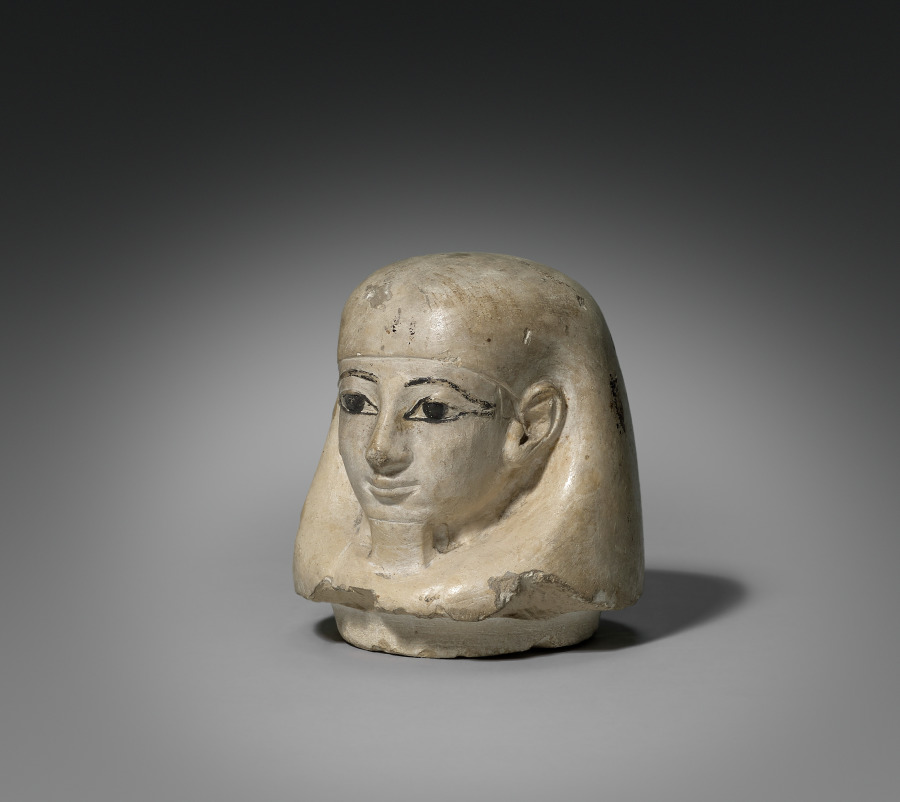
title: Canopic Jar with Lid (lid)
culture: Egypt, New Kingdom (1540–1069 BCE), Dynasty 18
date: 1540–1296 BCE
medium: limestone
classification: Funerary Equipment